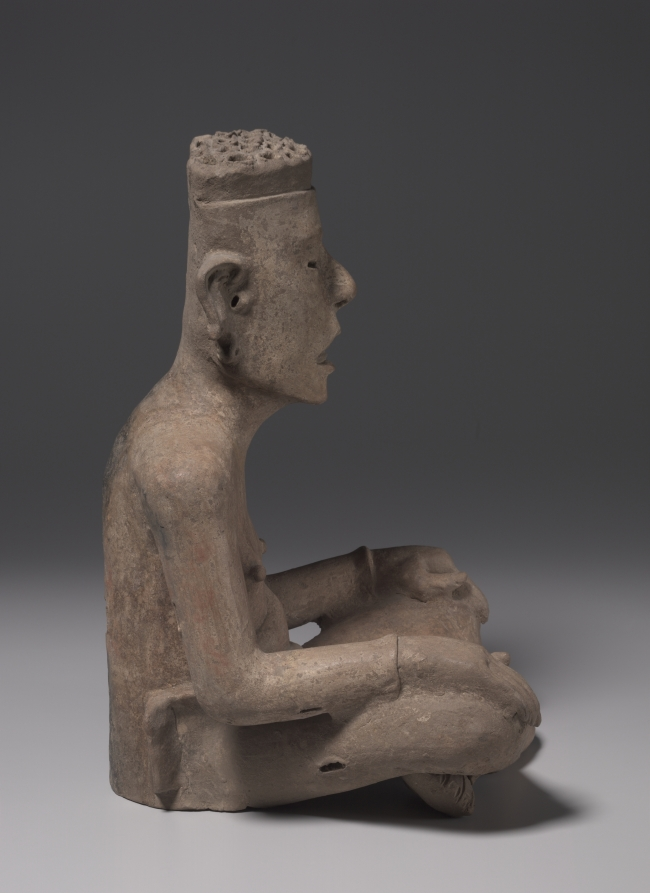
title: Seated Figure Wearing a Skin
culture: Mexico, Gulf Coast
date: 600–1000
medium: earthenware, slip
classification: Sculpture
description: This type of image-showing a human clothed in a sacrificial victim’s skin, visible around the mouth and wrists-is one of the most awesome created by Mesoamerican artists. The figure represents the deity Xipe Totec or a human impersonator. Among the later Aztecs, Xipe was associated with fertility, rain, and renewal. Perhaps the wearer, upon shedding the skin, was conceived as a sprout emerging from a withered husk. Xipe also had military connections.